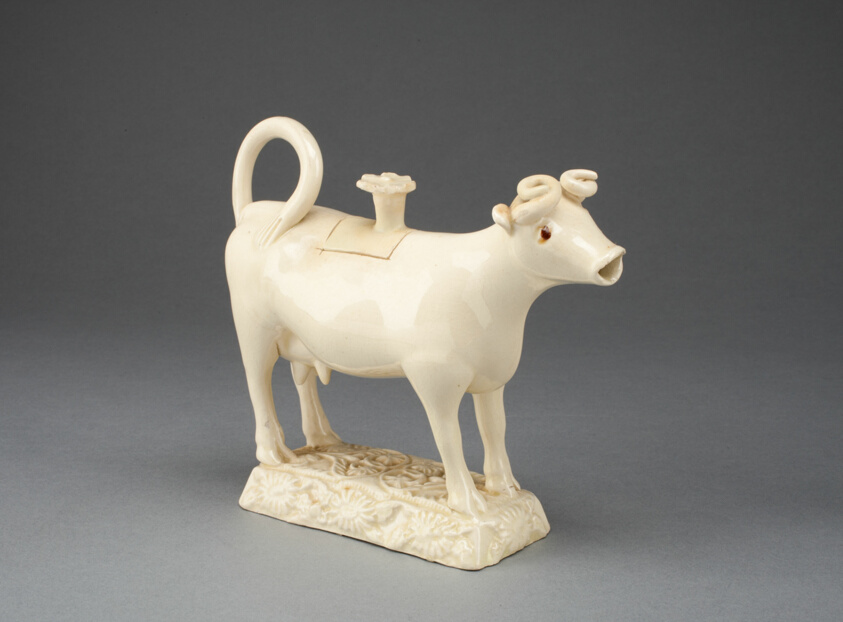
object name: Ceramics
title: Cow Creamer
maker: Staffordshire, England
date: c. 1750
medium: Lead-glazed earthenware (creamware)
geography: Staffordshire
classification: earthenware; ceramics; european decorative arts; creamware; lead-glazed earthenware